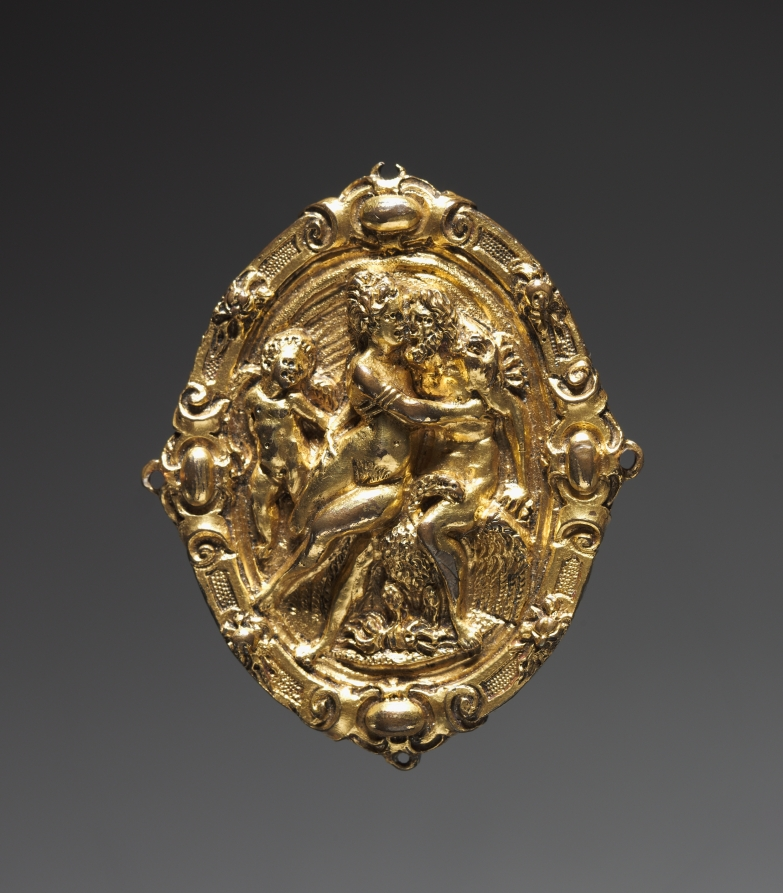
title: Jupiter and Juno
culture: Germany, late 16th century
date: late 1500s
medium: gilt bronze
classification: Sculpture